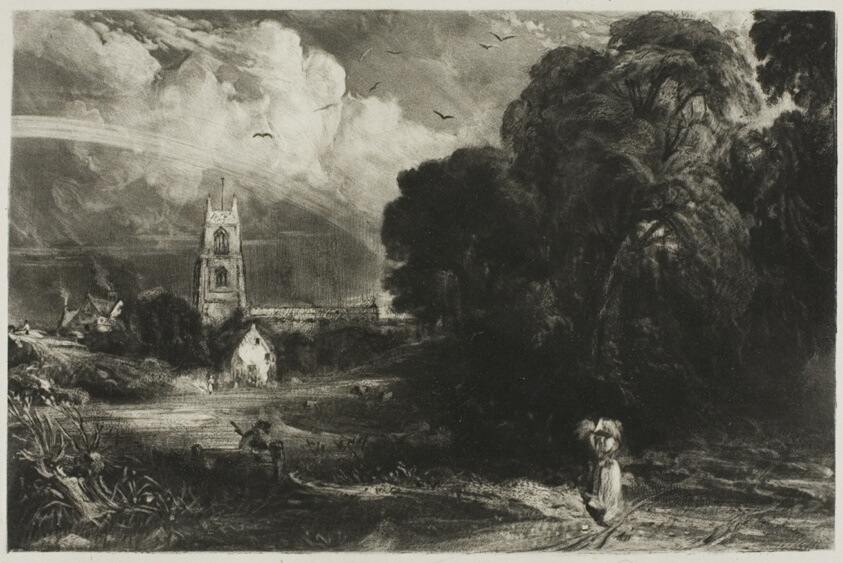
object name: Print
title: Stoke by Neyland, Suffolk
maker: David Lucas (English, 1802-1881); after John Constable (English, 1776-1837)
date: 1831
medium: Mezzotint on paper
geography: England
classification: mezzotint; print; prints and drawing